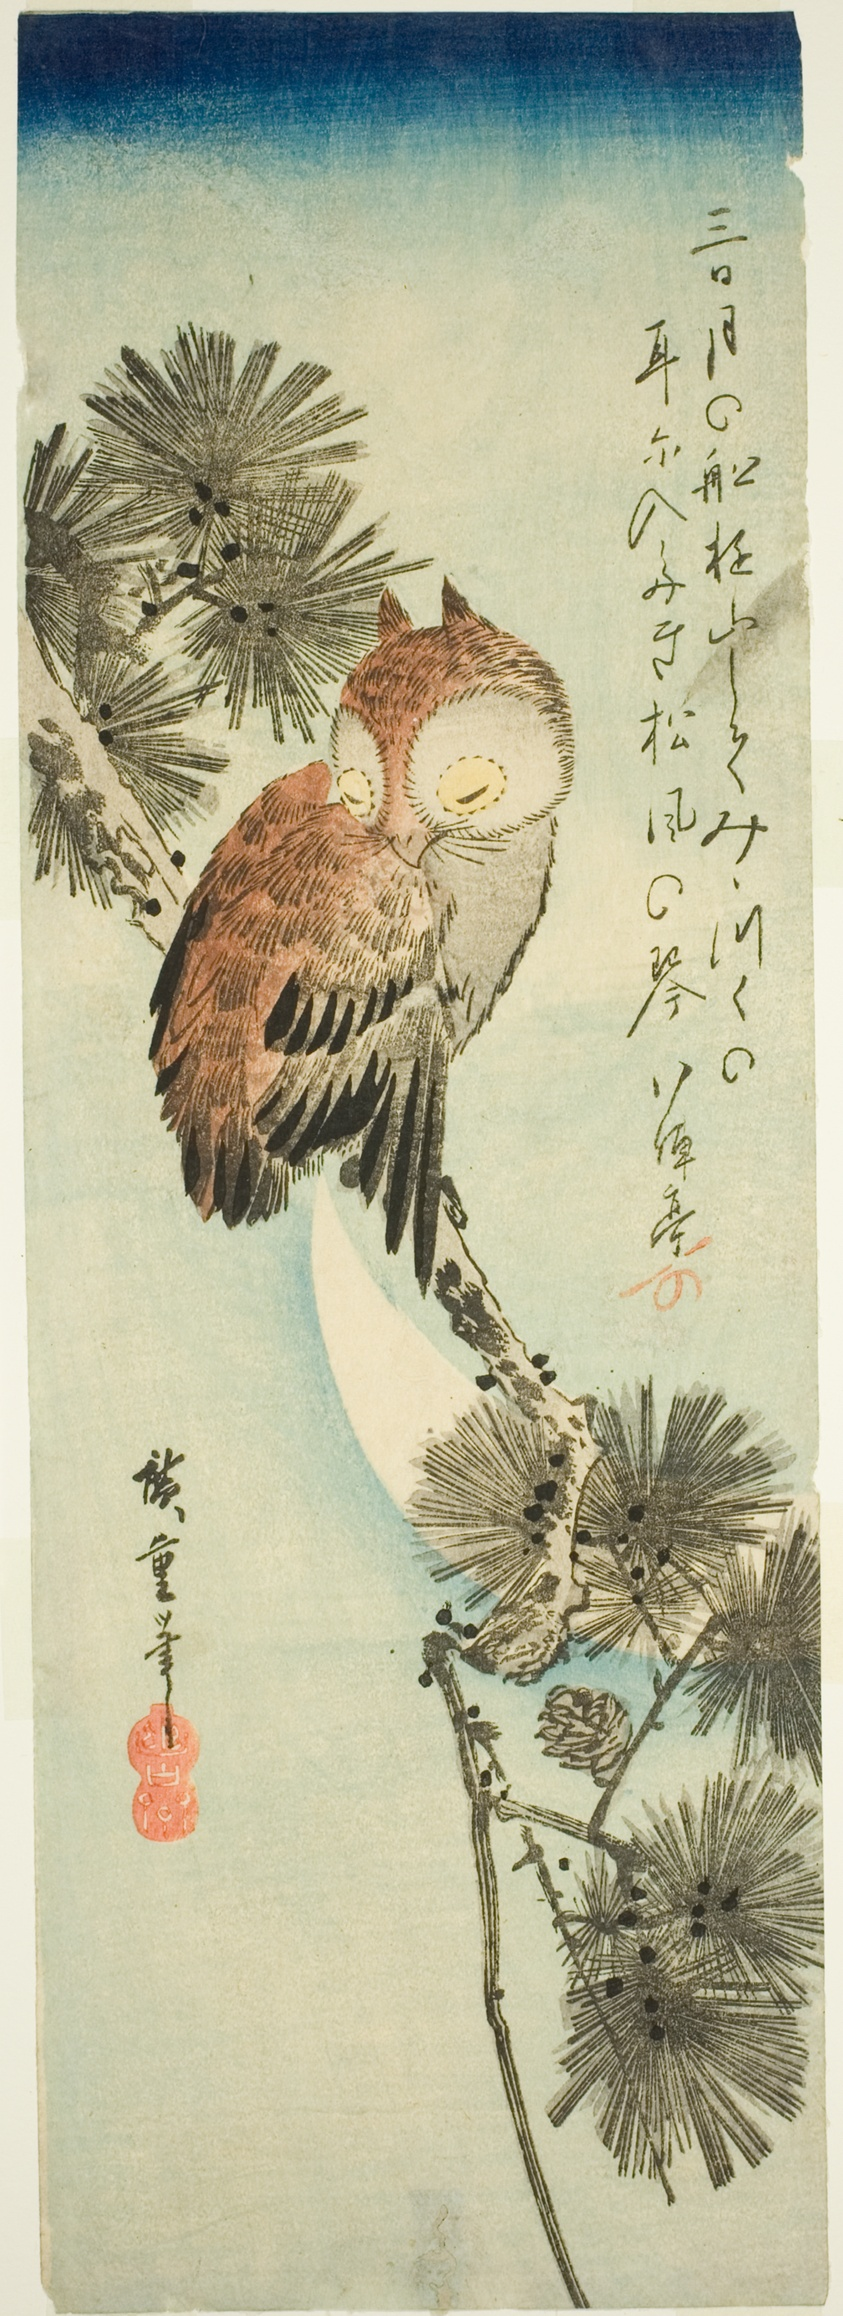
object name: Print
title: Small-horned owl, pine, and crescent moon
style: Japanese (culture or style)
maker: Utagawa Hiroshige 歌川 広重; Japanese, 1797-1858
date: 1830s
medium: Color woodblock print; chutanzaku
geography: Japan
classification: woodblock print; print; asian art